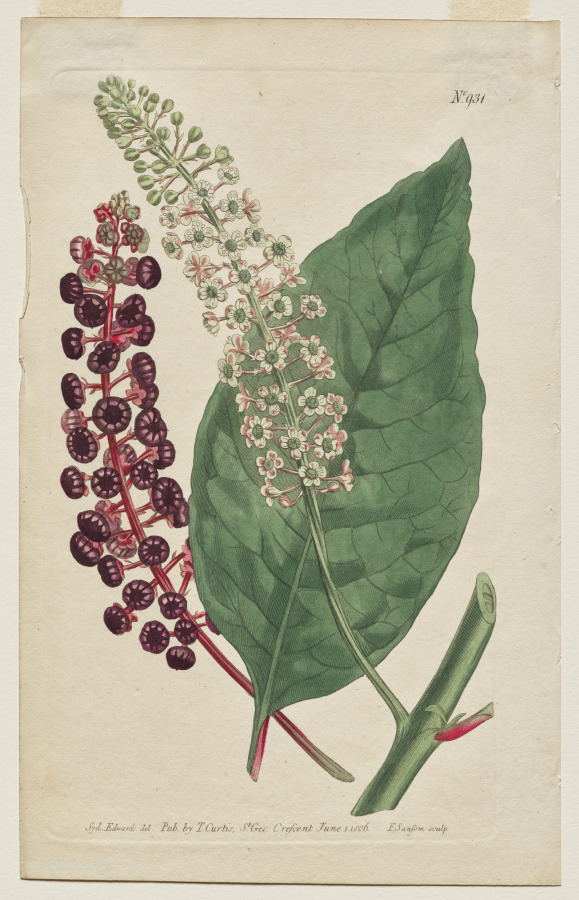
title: The Botanical Magazine or Flower Garden Displayed: Plate 931, Phytolacca Decandra. Virginian Poke. [Phytolaca Americana]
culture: England, 19th century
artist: Francis Sansom (British, 1815)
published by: Thomas Curtis (British, 1846–1920)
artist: after Sydenham Edwards (British, 1768–1819)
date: 1806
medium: engraving with hand coloring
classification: Print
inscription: upper right corner, engraved: No. 931 lower margin, engraved: Syd. Edwards del. Pub. By T. Curtis, St. Geo. Crescent June 1, 1806 F. Sansom sculp.